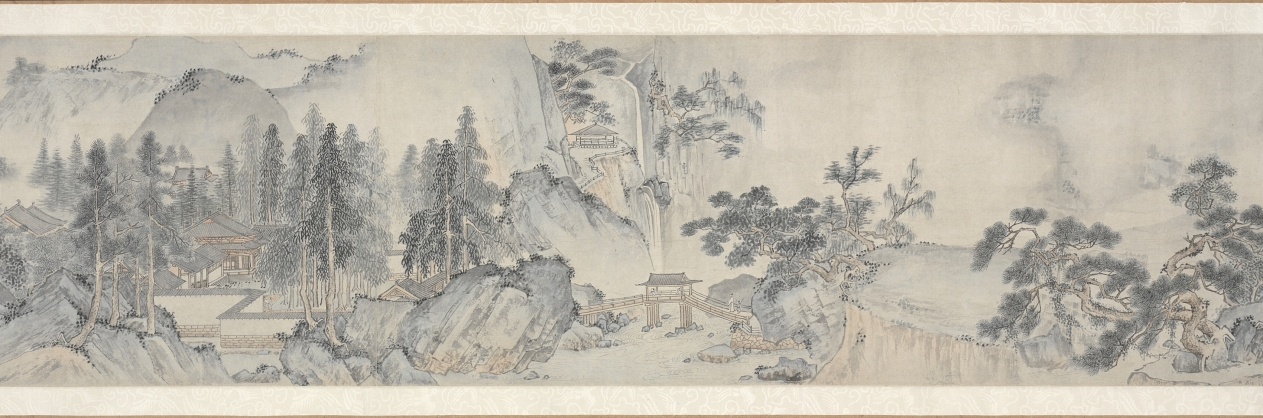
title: Ten Thousand Li of the Yangzi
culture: China, Ming dynasty (1368–1644)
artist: Dai Jin (Chinese, 1388–1462)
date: c. 1400s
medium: Handscroll; ink and color on paper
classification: Painting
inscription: Two colophons at end. Artist's seals: Dai Jin 戴進 and Wenjin 文進.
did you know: Dai Jin is traditionally considered the founder of the Zhe School, a style of landscape painting.